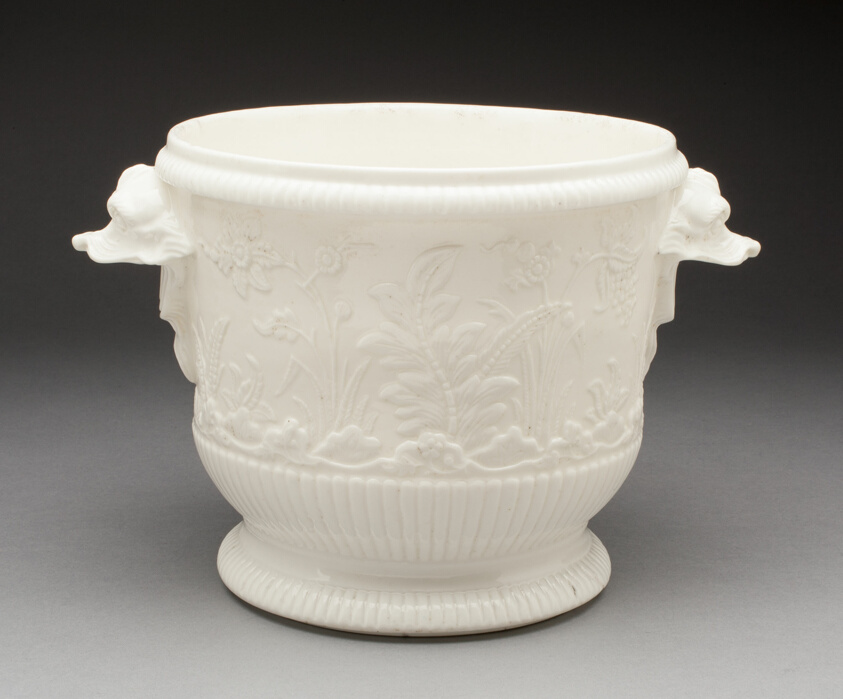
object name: Ceramics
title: Wine Bottle Cooler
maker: Saint-Cloud Porcelain Manufactory (France, c. 1693-1766)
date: 1720/40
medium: Soft-paste porcelain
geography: Saint-Cloud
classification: porcelain; decorative arts; ceramics